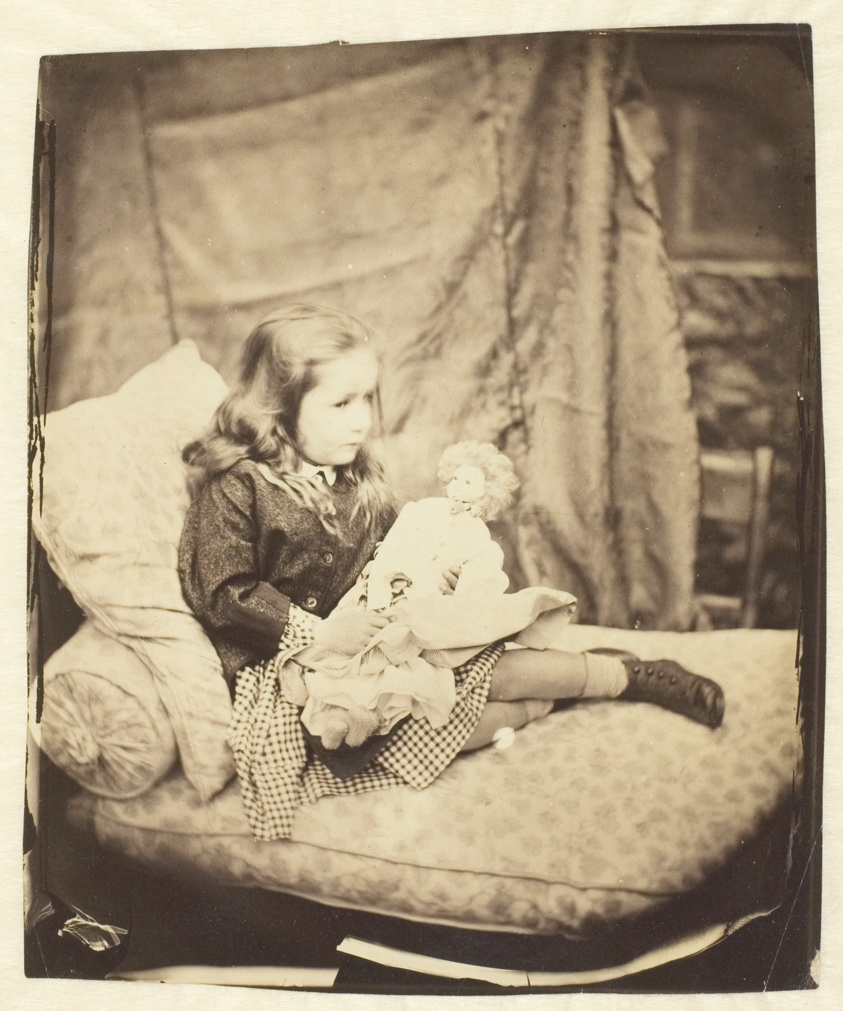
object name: Photograph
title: Margaret Frances Langton Clarke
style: 19th century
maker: Lewis Carroll (Charles Lutwidge Dodgson); English, 1832–1898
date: September 1864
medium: Albumen print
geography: England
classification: albumen silver print; photographic process; photography; photograph